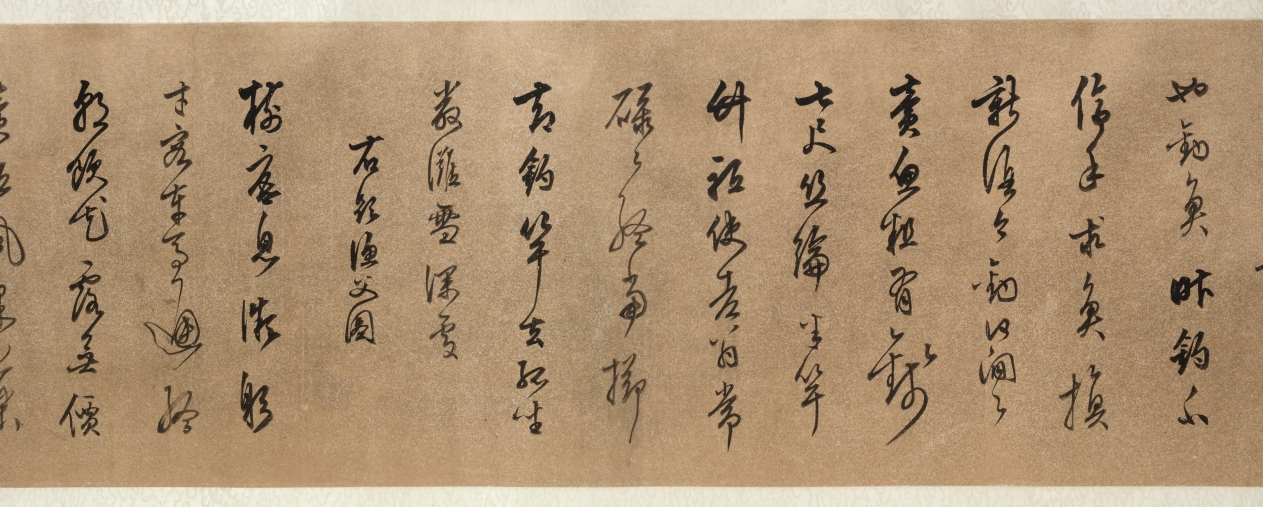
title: Four Poems: Calligraphy in Cursive Script (xingshu)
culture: China, Ming dynasty (1368–1644)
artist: Chen Jiru (Chinese, 1558–1639)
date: 1500s-1600s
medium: handscroll; ink on gold speckled paper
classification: Calligraphy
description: Written in graceful calligraphy with well-composed characters, the artist communicates his thoughts and state of mind in four poems. Characters written in dark, thick strokes convey rhythm, and indicate the moment after the writer had paused to recharge his brush with ink. Chen Jiru was a native of Huating (modern Shanghai). His calligraphy style resembles that of his friend, influential calligrapher Dong Qichang (1555–1636). Unlike Dong, Chen did not pursue government service: he burned his Confucian robes, declined a summons to serve at court, and immersed himself in literature, calligraphy, and painting.